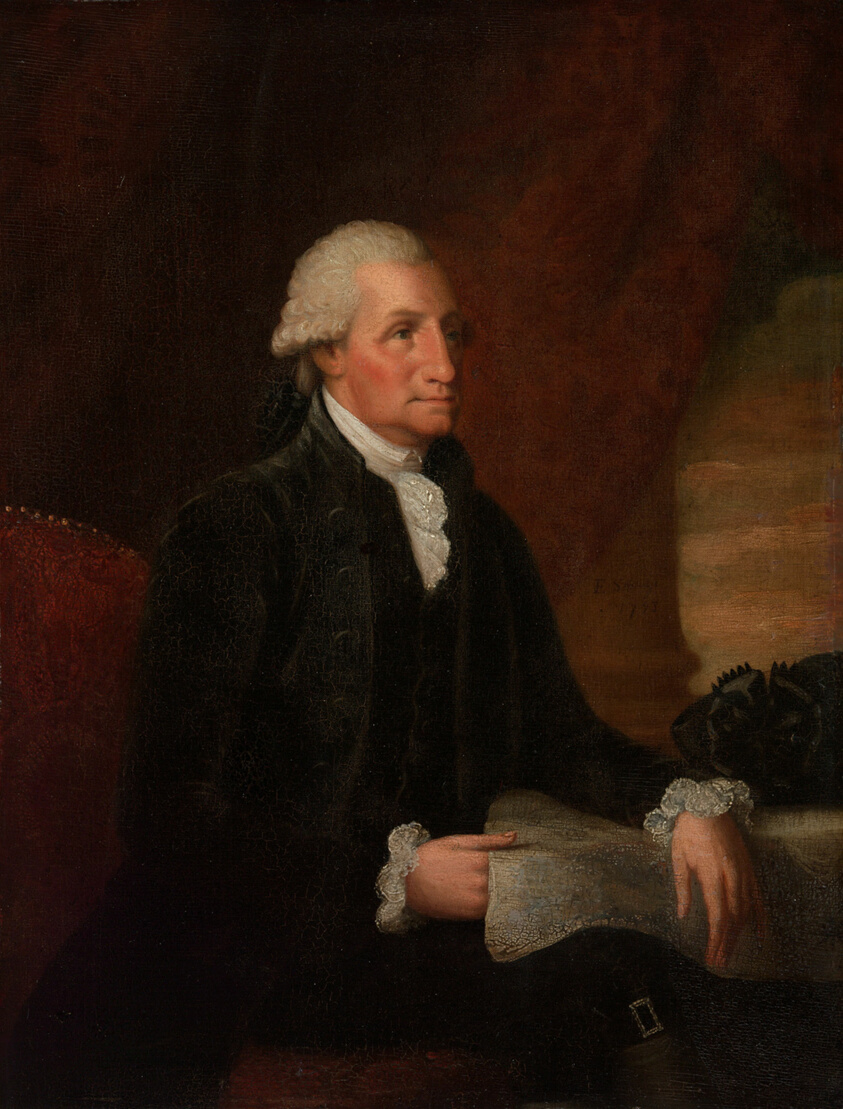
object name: Painting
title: George Washington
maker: Edward Savage (American, 1761–1817)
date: 1793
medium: Oil on mahogany panel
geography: United States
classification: painting; american arts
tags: fashion, Century of Progress, world's fairs, Chicago World's Fairs, people, portraits